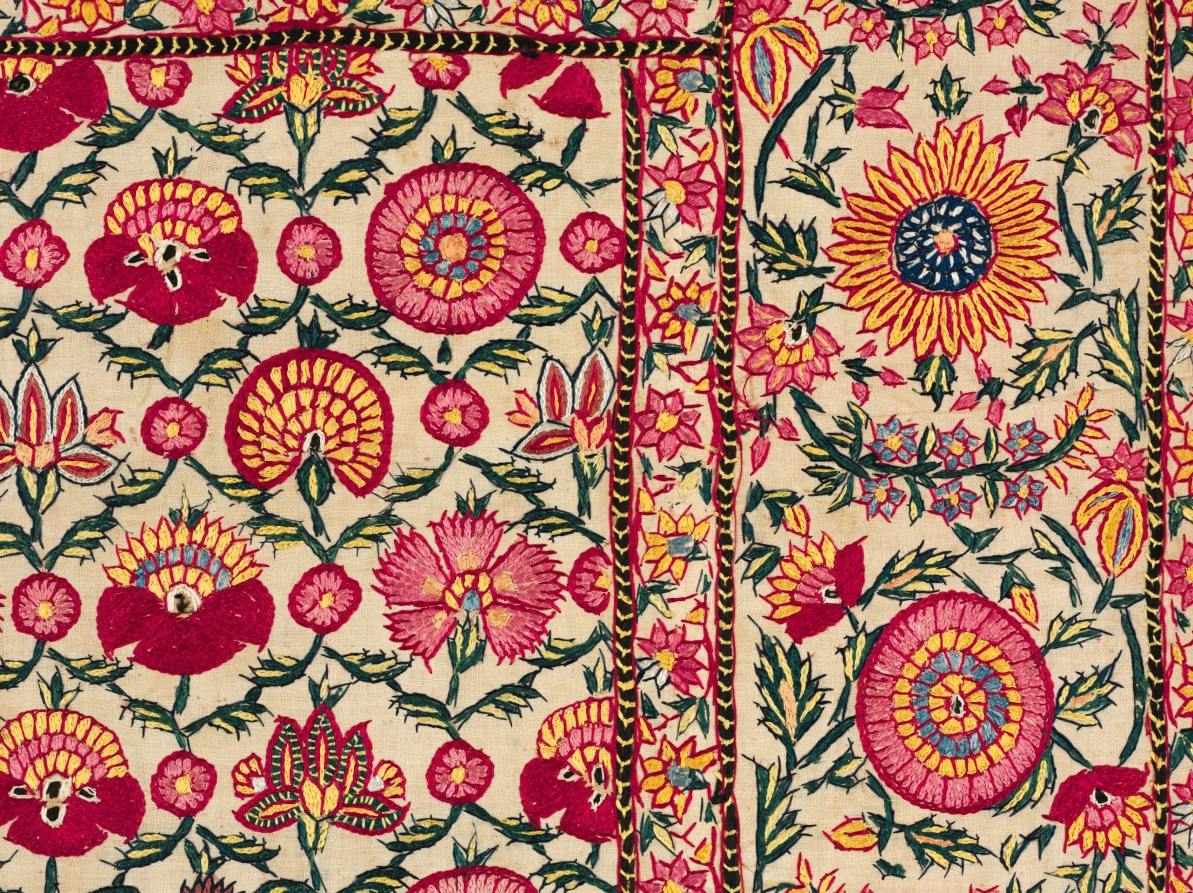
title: Embroidered Cover or Hanging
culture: India, Delhi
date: 1600s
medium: Silk on linen tabby ground; embroidery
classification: Embroidery